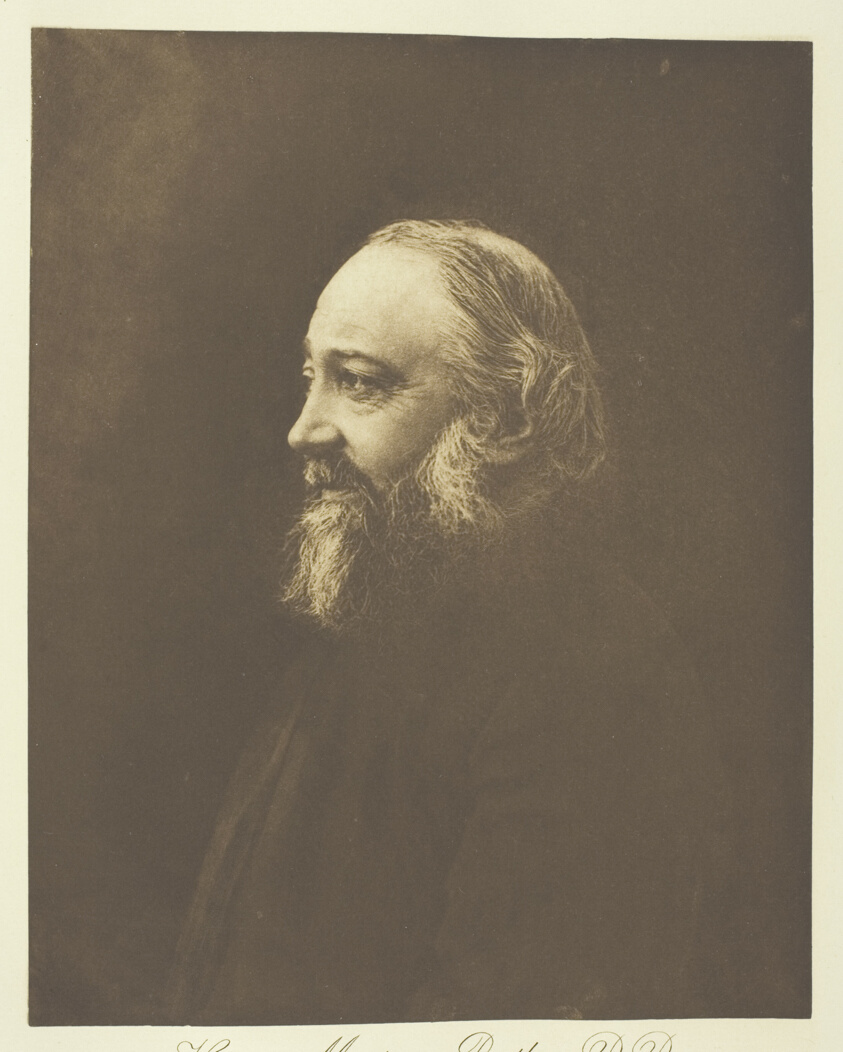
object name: Photograph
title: The Very Reverend Dr. Butler (Master of Trinity, Cambridge)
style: 19th century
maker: Henry Herschel Hay Cameron (English, 1852–1911)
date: c. 1893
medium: Photogravure, plate 20 from the album "Lord Tennyson and his Friends" (1893)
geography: England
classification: photogravure; photomechanical process; photography; photograph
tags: Collected by Hugh Edwards, Lord Tennyson and His Friends